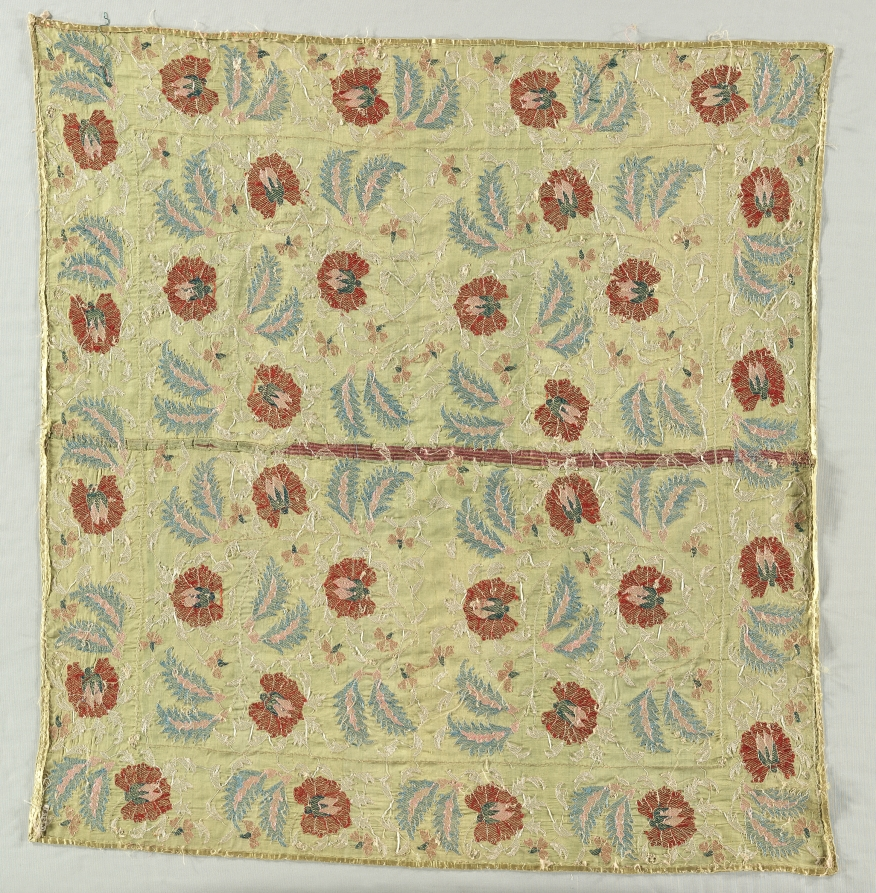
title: Embroidered Cover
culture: Turkey, 18th century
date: 18th century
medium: embroidery; silk and gold filé on silk ground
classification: Embroidery